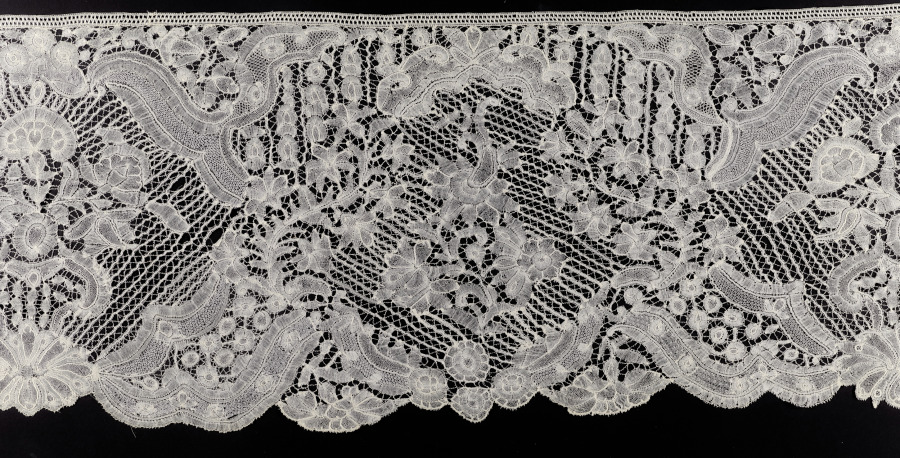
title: Lace Flounce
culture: Belgium, Brabant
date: 1600s–1700s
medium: Linen: bobbin lace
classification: Lace